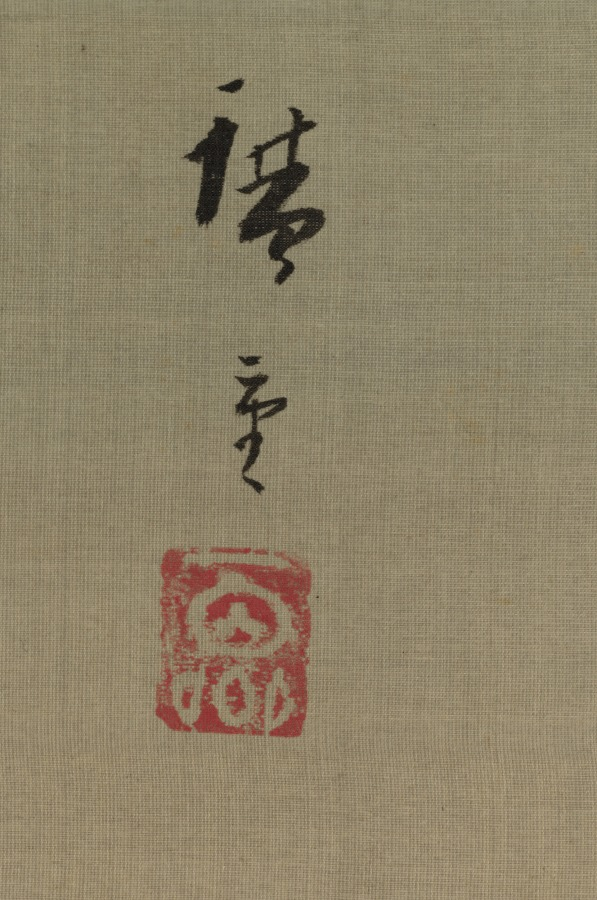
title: Night Scene on the Sumida River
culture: Japan, Edo period (1615–1868)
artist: studio of Utagawa Hiroshige (Japanese, 1797–1858)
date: 1800s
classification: Painting